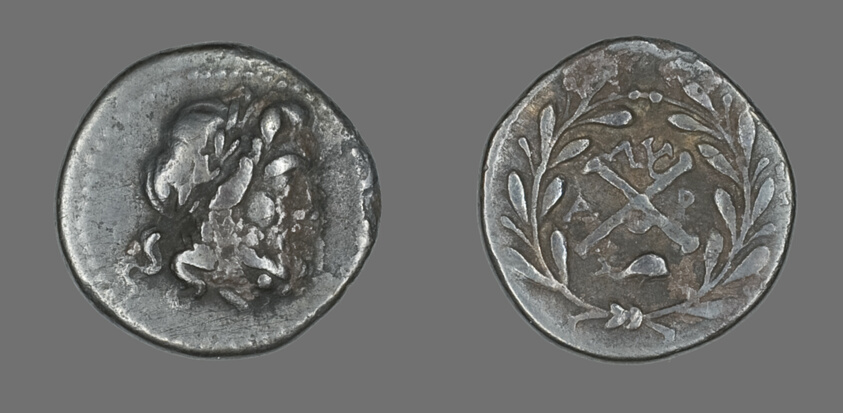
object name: Coin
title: Hemidrachm (Coin) Depicting the God Zeus Amarios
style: greek, ancient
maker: Greek, minted in Lycoa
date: 280-146 BCE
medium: Silver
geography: Ancient Greece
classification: coin; ancient art